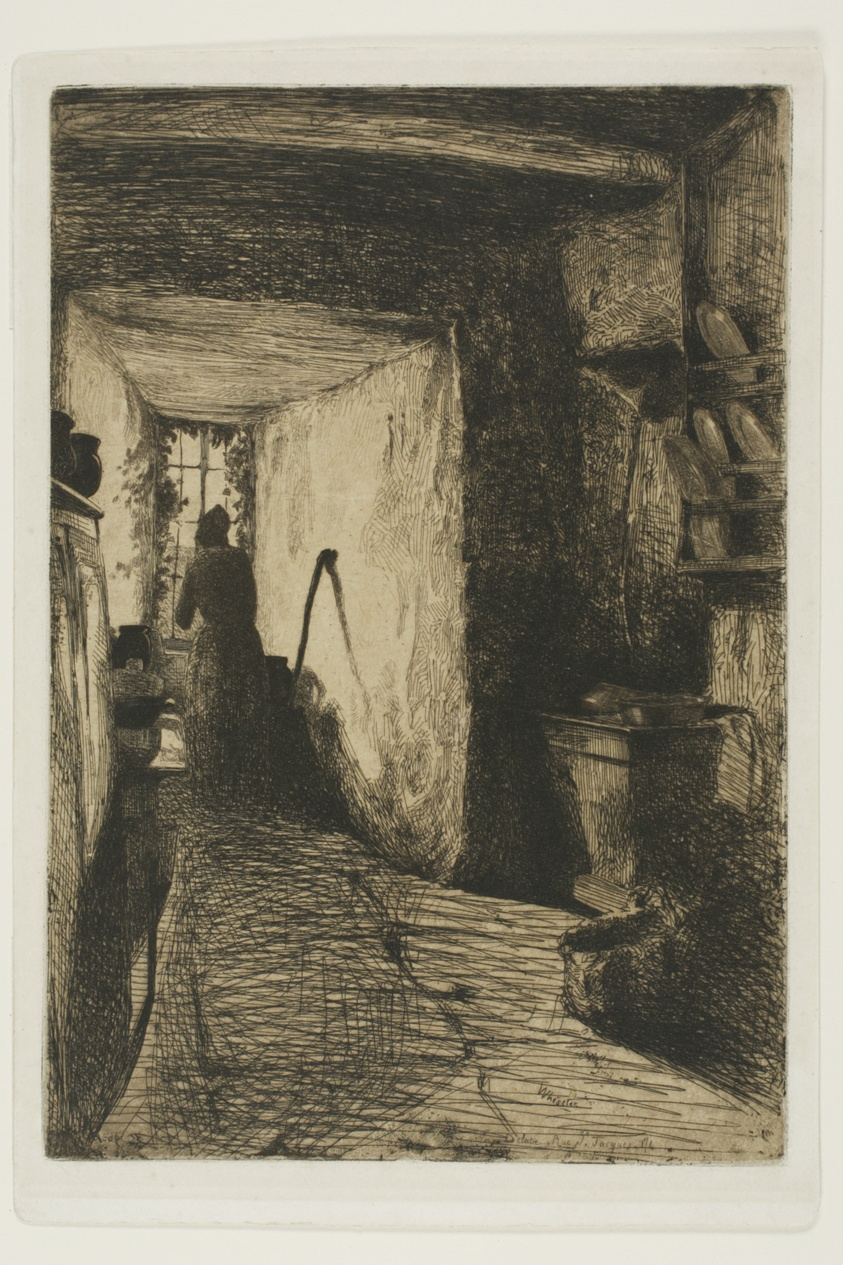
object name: Print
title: The Kitchen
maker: James McNeill Whistler (American, 1834-1903)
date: 1858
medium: Etching with foul biting in black ink on buff China paper laid down on off-white wove paper (chine collé)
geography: United States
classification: etching; foul biting; print; prints and drawing; paper